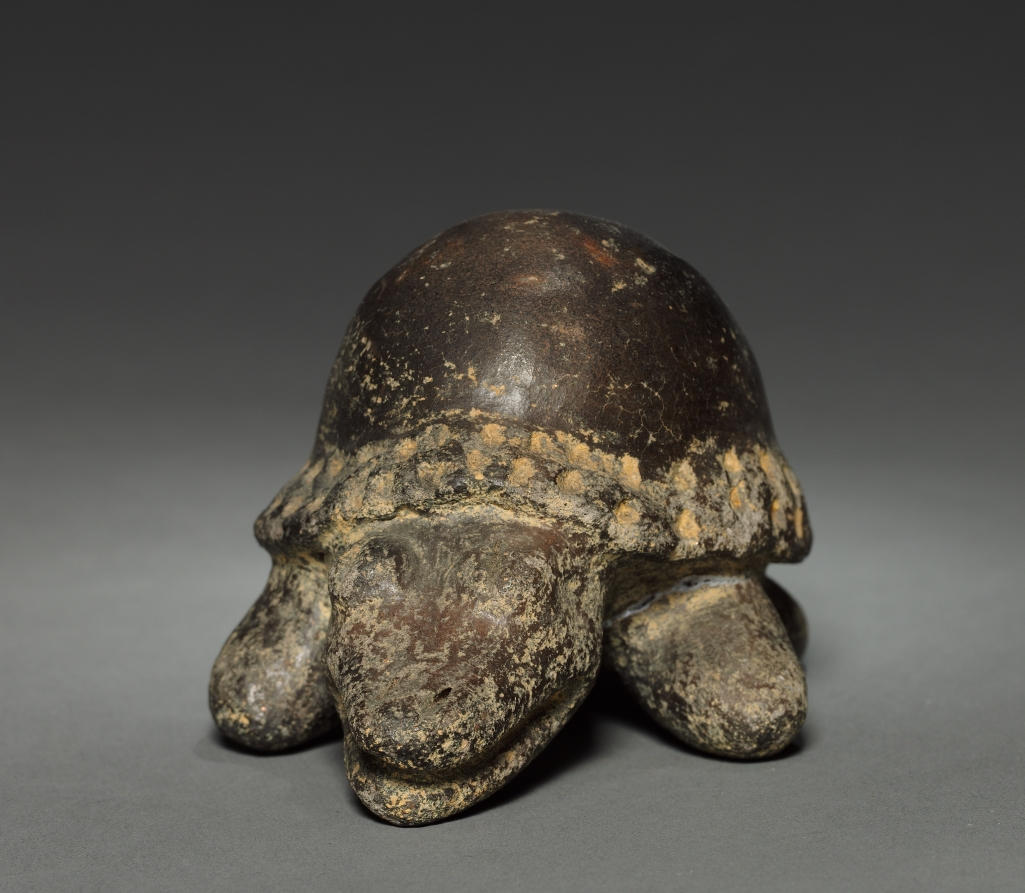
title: Turtle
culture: Colombia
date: before 1921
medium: pottery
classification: Ceramic